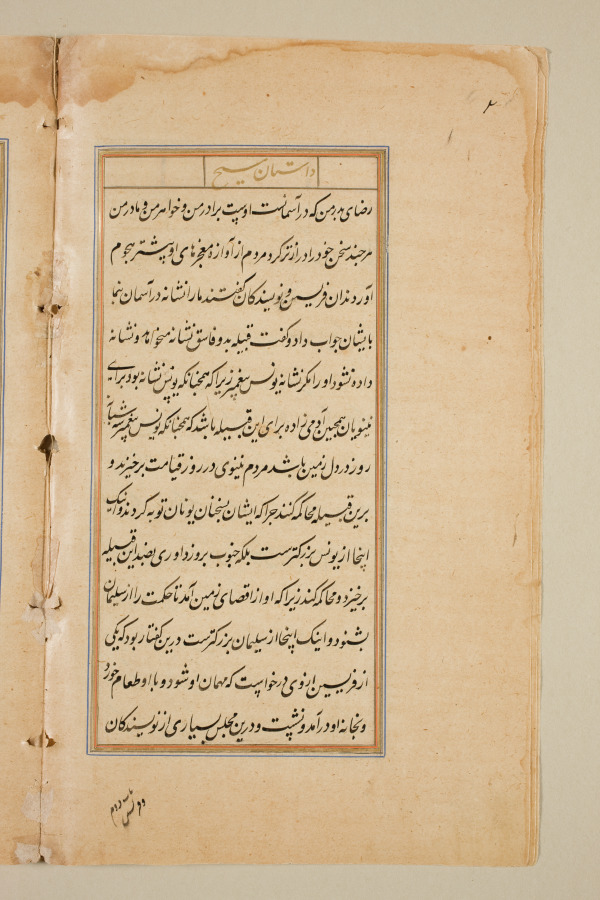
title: Text page from a Mirror of Holiness (Mir’at al-quds) of Father Jerome Xavier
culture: Mughal India, Allahabad, made for Prince Salim (1569–1627)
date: 1602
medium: Ink and gold on paper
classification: Manuscript